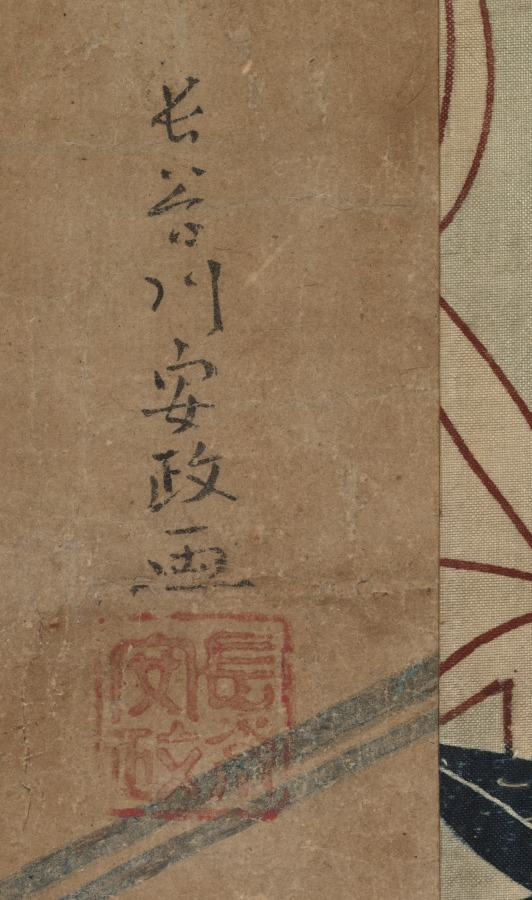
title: Playing the "Hand Game"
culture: Japan, Edo period (1615–1868)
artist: Hasegawa Yasumasa (Japanese)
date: c. 1760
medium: hanging scroll; ink and color on paper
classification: Painting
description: This scene depicts three people playing a game in which three players make hand gestures simultaneously. The relationship among the gestures determines the winner. Known as hand games, during the eighteenth century they were popular in Japan among courtesans. In this version, the contestants use both hands, indicating a special variation such as the fox hand game, which features gestures for a fox, a village leader, and a hunter.